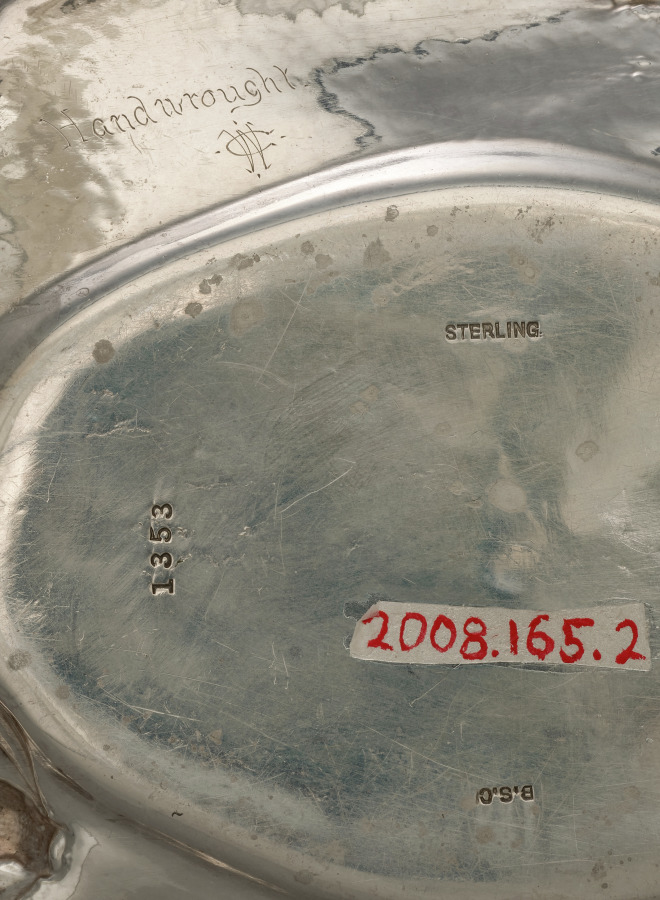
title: Sauce Boat and Tray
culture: America, Rhode Island, 19th century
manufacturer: Barbour Silver Company (American)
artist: attributed to William Christmas Codman (British, 1839–1921)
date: c. 1890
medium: silver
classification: Silver